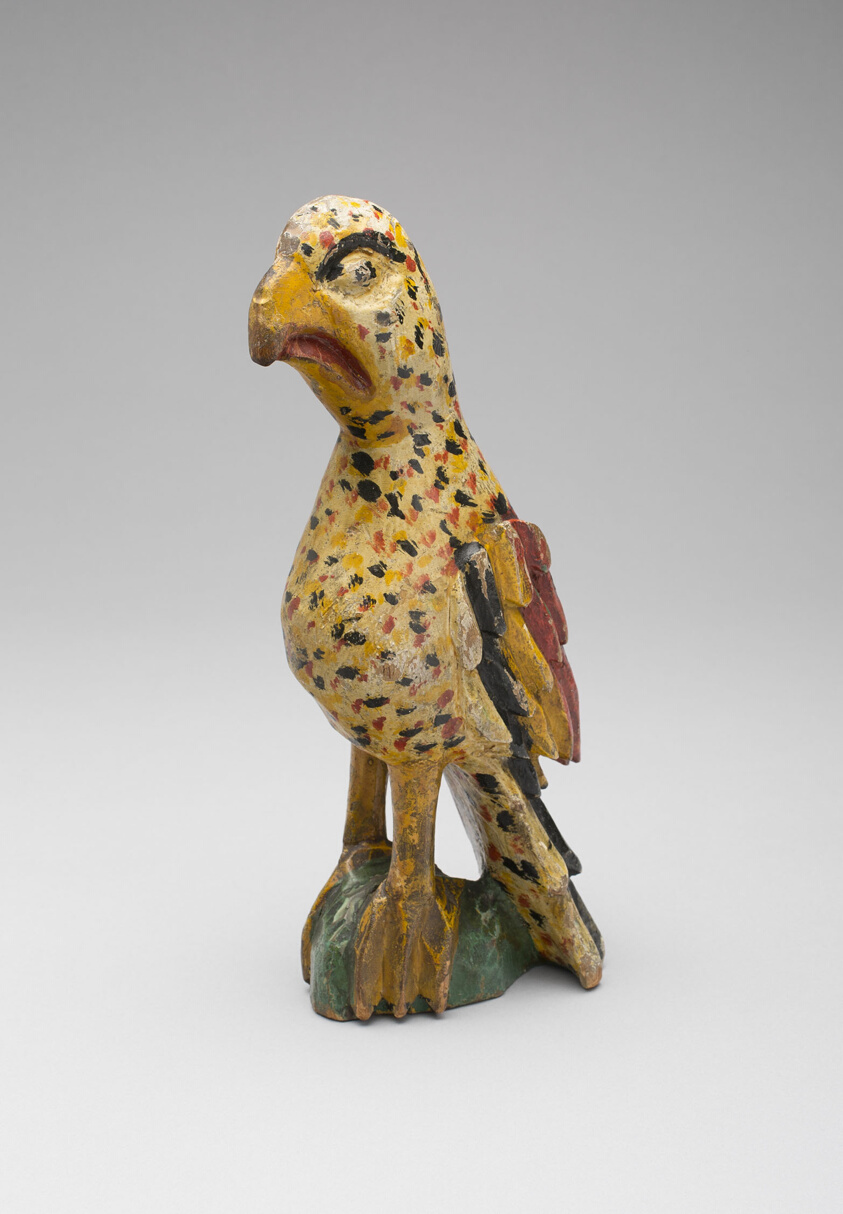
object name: Decorative Arts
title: Parrot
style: Folk Art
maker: Wilhelm Schimmel; American, born Germany, 1817–1890; Cumberland County, Pennsylvania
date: 1870–90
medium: Wood and paint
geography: Pennsylvania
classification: sculpture; american decorative arts; american arts; decorative arts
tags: animals